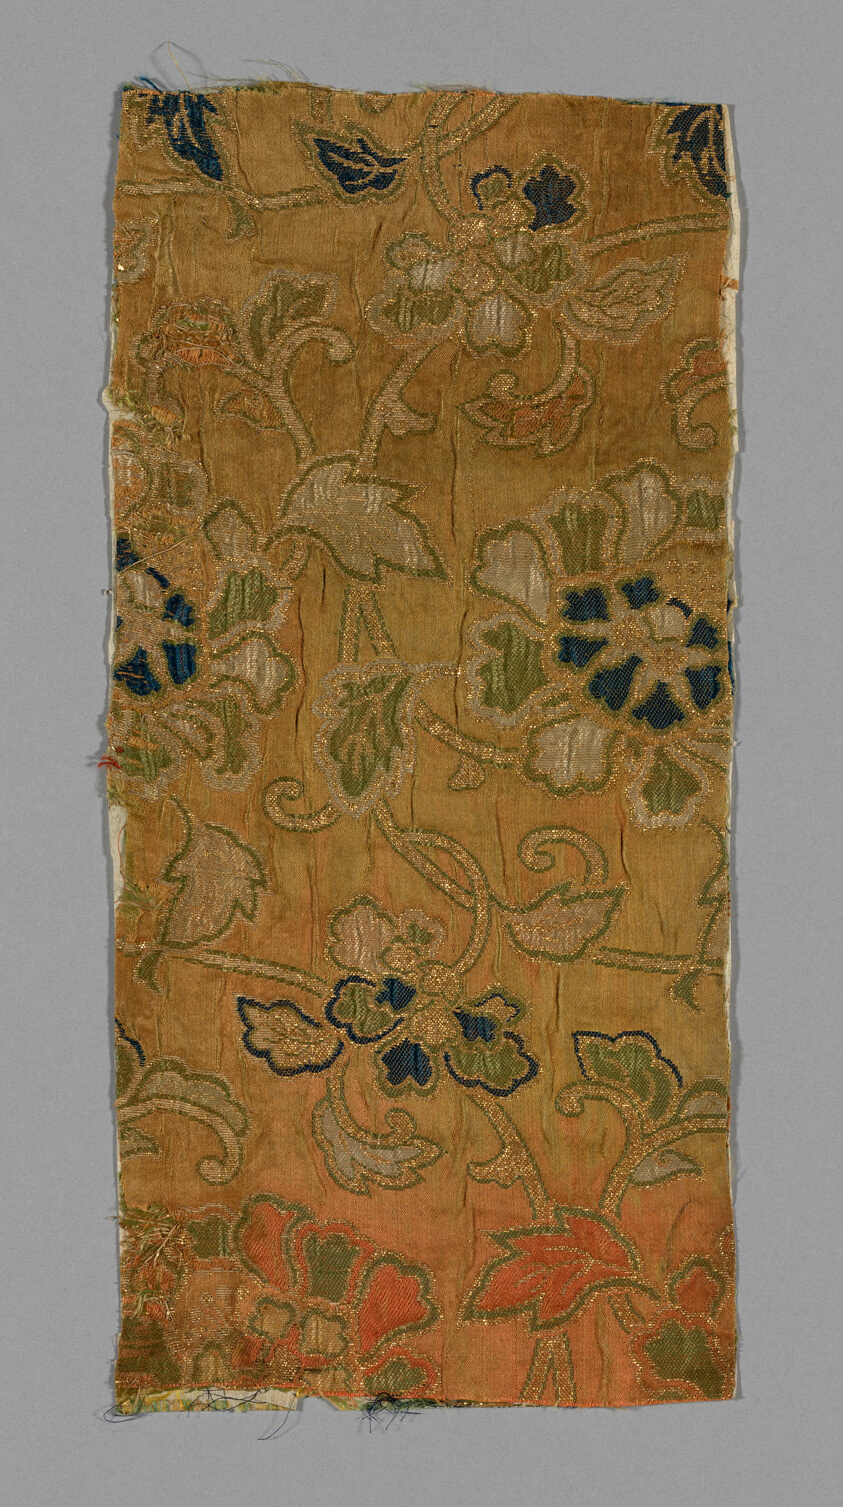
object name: Textile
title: Fragment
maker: China or Japan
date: 18th century, late Edo period (1789–1868)/ Meiji period (1868–1912)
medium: Silk and gold-leaf-over-lacquered-paper-strip, satin weave with supplementary patterning wefts bound by secondary binding warps in twill interlacings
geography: China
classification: textile; weaving